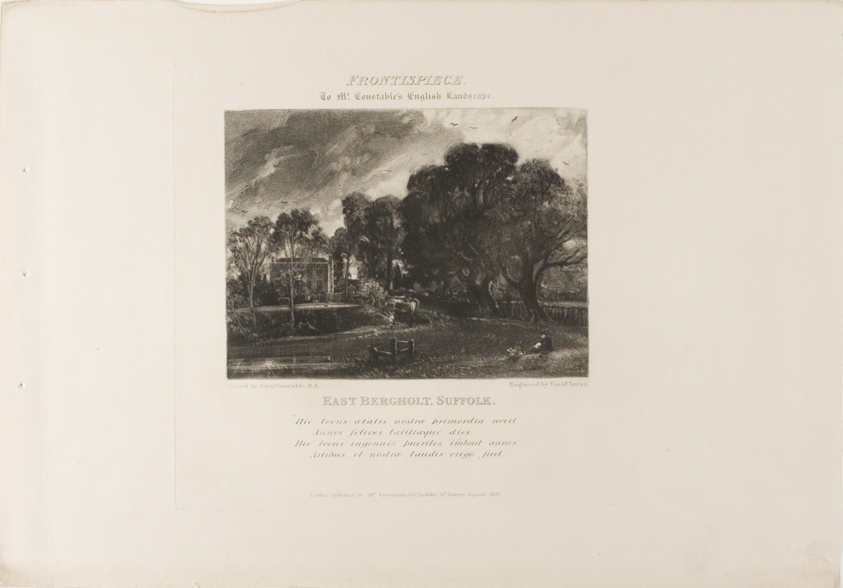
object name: Print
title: The River Stour, from Various Subjects of English Landscape Scenery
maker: David Lucas (English, 1802-1881); after John Constable (English, 1776-1837)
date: 1830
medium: Mezzotint in black ink on heavy ivory wove paper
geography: England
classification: mezzotint; print; prints and drawing